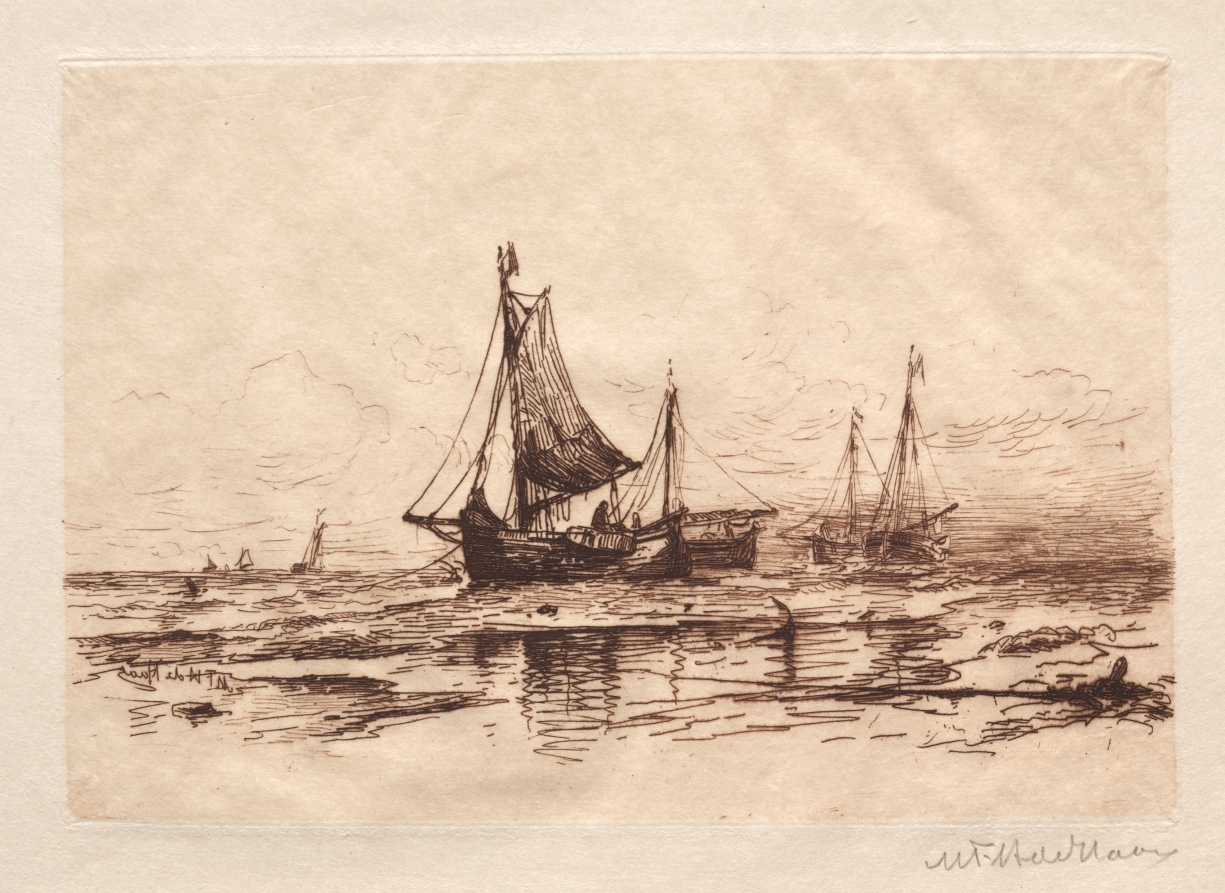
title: Fishing Boats on the Beach at Scheveningen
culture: America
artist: Maurits Frederik Hendrik De Haas (American, 1832–1895)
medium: etching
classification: Print